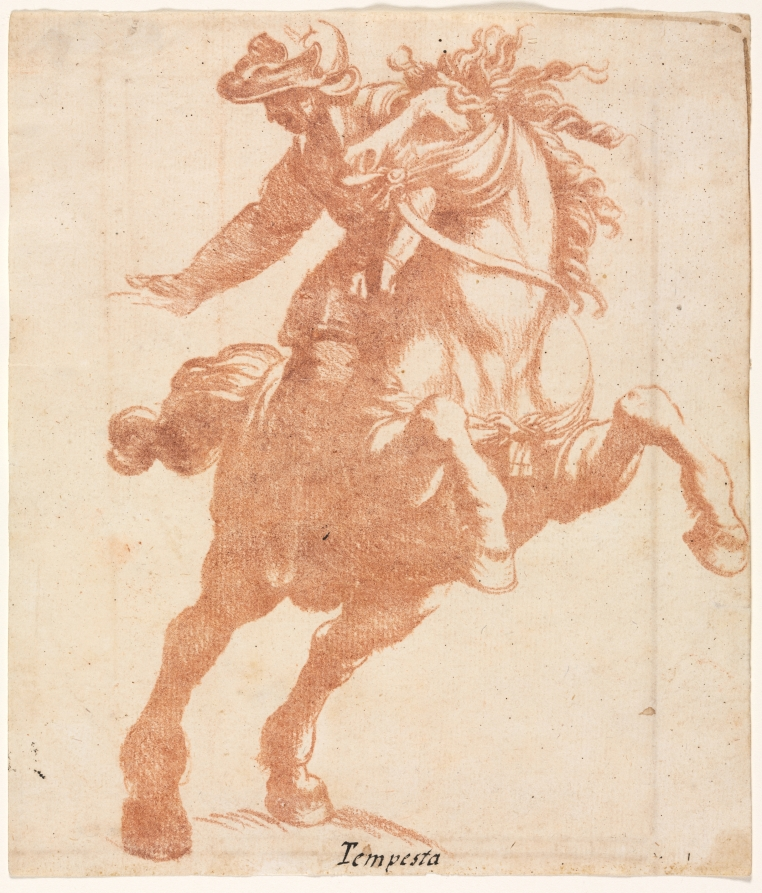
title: Rearing Horse and Rider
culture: Italy, late 16th-early 17th century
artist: attributed to Antonio Tempesta (Italian, 1555–1630)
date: c. 1600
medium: red chalk counterproof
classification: Drawing